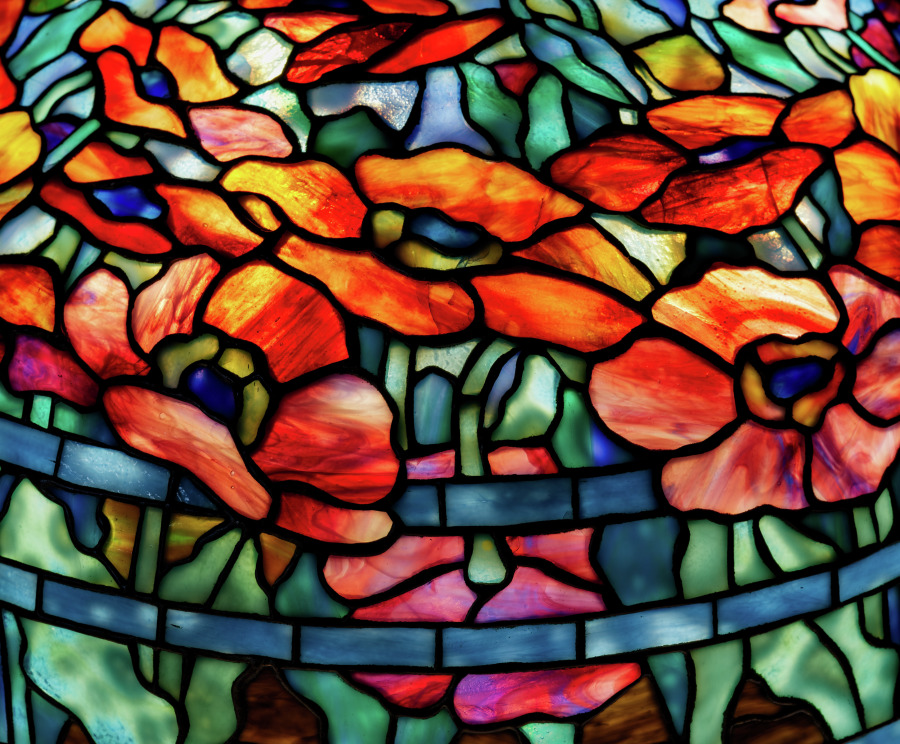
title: Oriental Poppy Table Lamp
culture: America, New York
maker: Tiffany Studios (United States, New York, 1902–32)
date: c. 1902–10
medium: Leaded glass, gilt bronze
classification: Lamp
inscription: TIFFANY STUDIOS NEW YORK 1583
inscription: TIFFANY STUDIOS/NEW YORK/669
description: In the 1870s a renewed emphasis on natural landscapes ushered in a generation of cottage gardeners who delighted in planting perennials in large quantities. Louis Comfort Tiffany was among those who championed the lush, sometimes wild-looking displays of varied floral species in the garden at his Long Island estate, Laurelton Hall. Tiffany encouraged his designers to take inspiration from his garden by shipping fresh cuttings almost weekly to his studios. Ohio native Clara Wolcott Driscoll and her team of female designers created floral patterns for lamps and mosaics based on the colorful blooms of spring that became among the most sought after and commercially successful of Tiffany’s production.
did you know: Louis Comfort Tiffany sold many shades in standardized sizes and shapes so that they could be interchangeable, such as this combination of a poppy shade on an iris base.